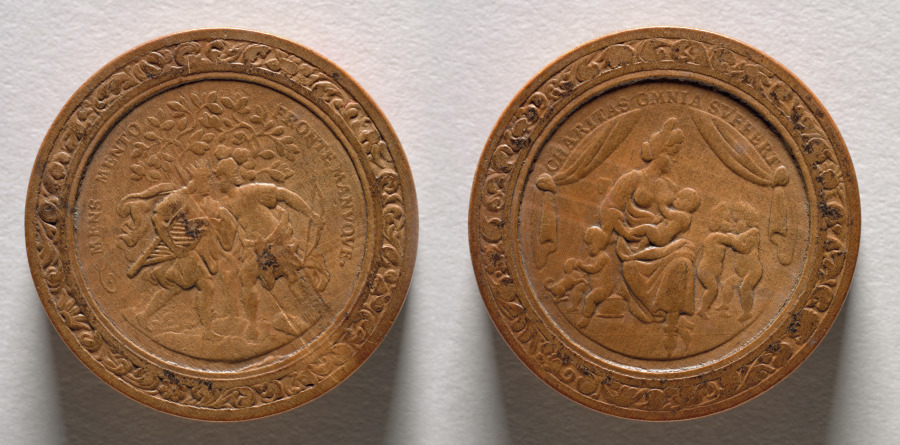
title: Gaming Piece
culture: Germany, late 17th-early 18th Century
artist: Martin Brunner (German, 1659–1725)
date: c.1700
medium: wood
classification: Furniture and woodwork